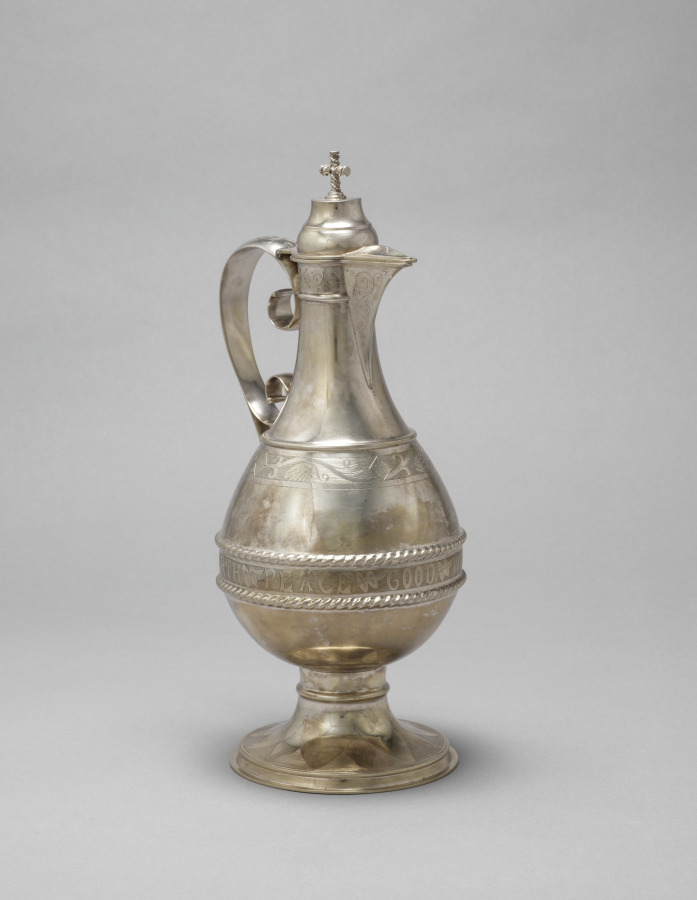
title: Flagon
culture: America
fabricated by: Francis W. Cooper (American)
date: c. 1853–1855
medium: silver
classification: Silver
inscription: engraved inscription around waist: "ON EARTH PEACE GOOD WILL TOWARDS MEN."